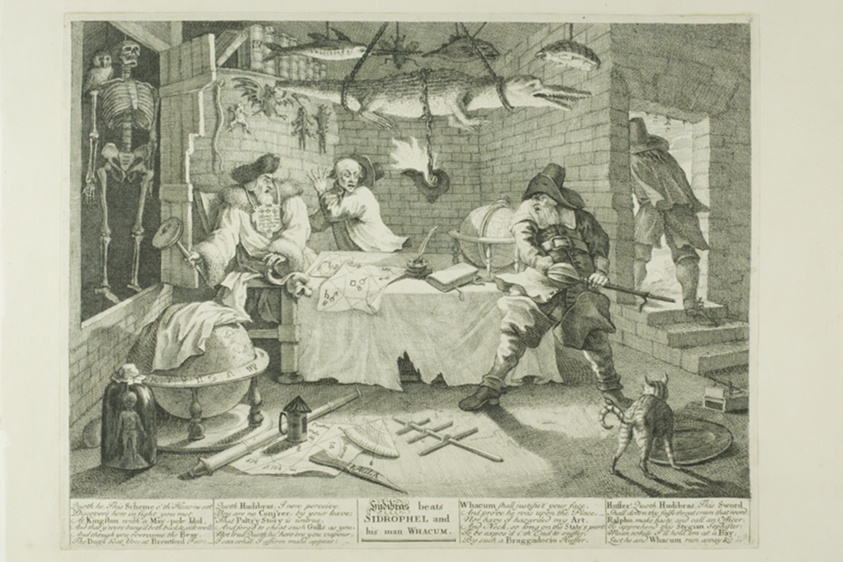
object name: Print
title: Hudibras and Sidrophel, plate eight from Hudibras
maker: William Hogarth (English, 1697-1764)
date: February 1725/26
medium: Etching and engraving in black on cream paper edge, mounted on cream wove paper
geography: England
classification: engraving; prints and drawing; print; etching